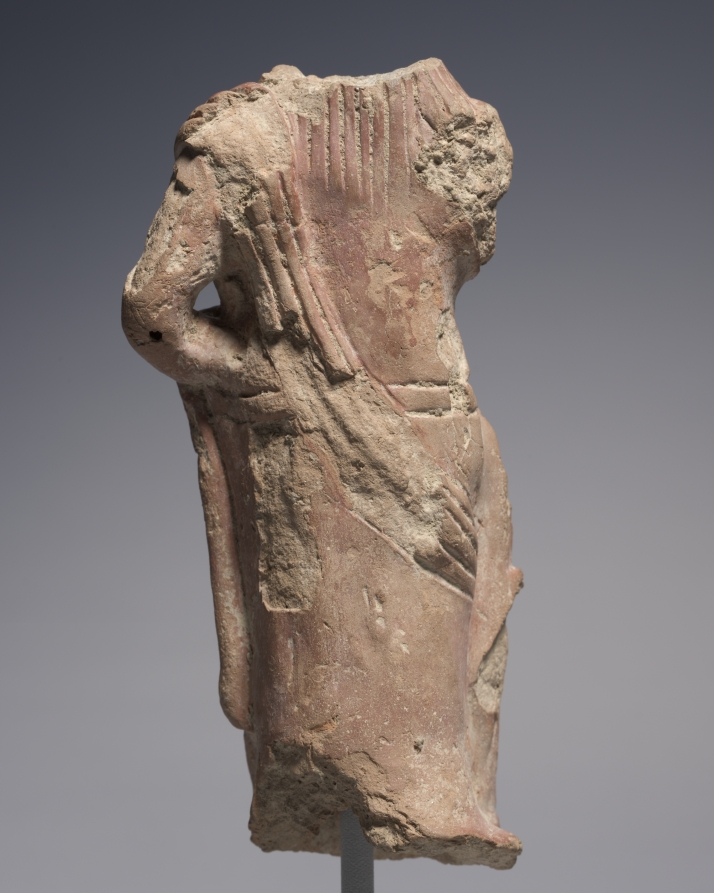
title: Male Fertility Divinity, Possibly Shiva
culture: Northern India, possibly Mathura, Kushan period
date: c. 120–200 CE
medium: terracotta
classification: Sculpture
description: This figure combines an unusual set of attributes. He has long dreadlocks over his shoulders, like an ascetic, and he holds a water pot, like a Brahmin or naga (serpent deity). Also, he seems to carry a sword and dagger like a warrior and is ithyphallic, indicating his virility and fecundity. He may best be identified as a local divinity worshipped for purposes of increasing fertility, but he could also be recognized as an early form of the Hindu god Shiva.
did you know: This sculpture was first made from a mold, then subsequently hand modeled.